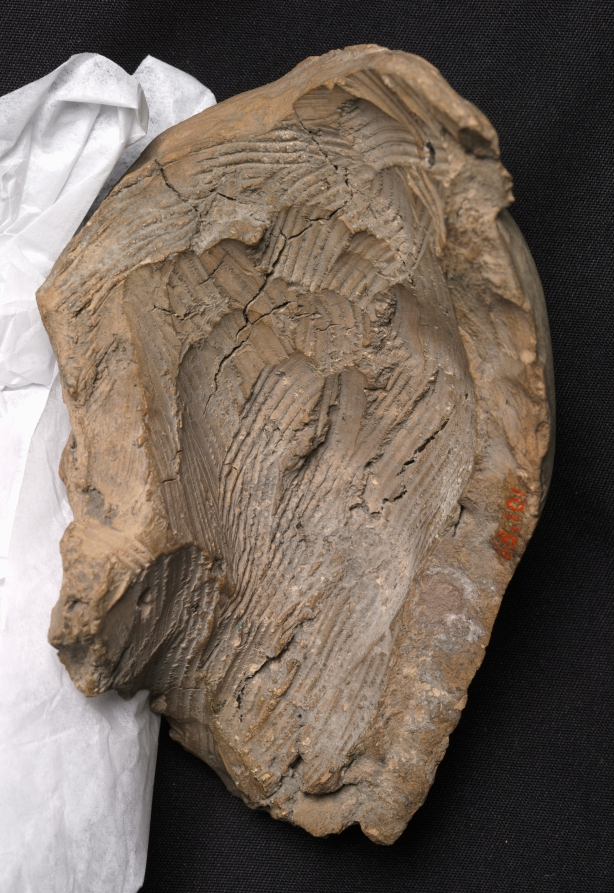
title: Head of Proserpina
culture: Italy, 17th century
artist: after Gian Lorenzo Bernini (Italian, 1598–1680)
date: 1650– 1700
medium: terracotta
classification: Sculpture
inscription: penciled inscription on neck: "Palazzo Bernini / 1839"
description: This work was long thought to be a fragment of a preliminary study for a large-scale marble sculpture by Gian Lorenzo Bernini in Rome depicting Pluto, the god of the underworld, dragging Proserpina away to be his wife. Bernini’s finished studies never had the scrape marks visible on the cheek, indicating another sculptor’s hand. The work was owned by Bernini’s family, and his many studio assistants often copied his work. This terracotta therefore may be by one of the more significant sculptors of this group. The subject conveys fleeting expressions of sadness, fear, and surprise, and would have interested sculptors learning to convey complex emotions.